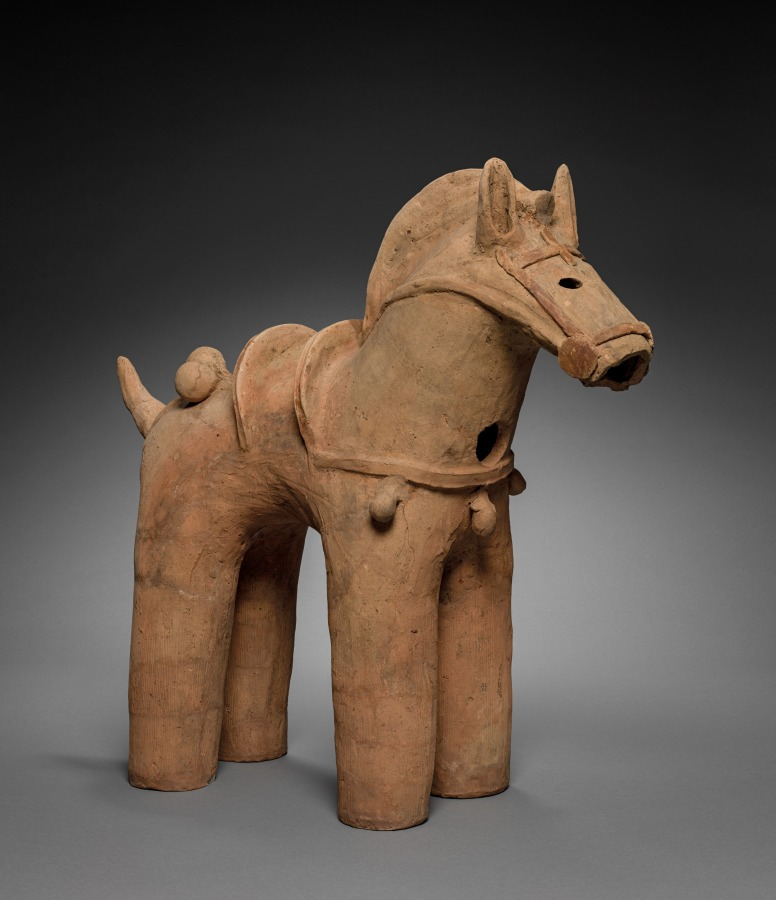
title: Haniwa Horse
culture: Japan, Kofun period (300–710 CE)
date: 400s–500s CE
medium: earthenware with traces of pigment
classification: Sculpture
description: This horse’s tack, with its round bells, resembles saddlery in fashion in Korea during the 400s–500s CE. Concurrent with mass migration from the Korean Peninsula, tombs covered with large earthen mounds similar to those on the Asian continent began to appear in Japan around the year 300 CE. Called “old mounds” (kofun), their surfaces were covered with hollow clay cylinders (haniwa). Sculptures of animals, buildings, and finally human figures followed, developing over the ensuing three centuries.